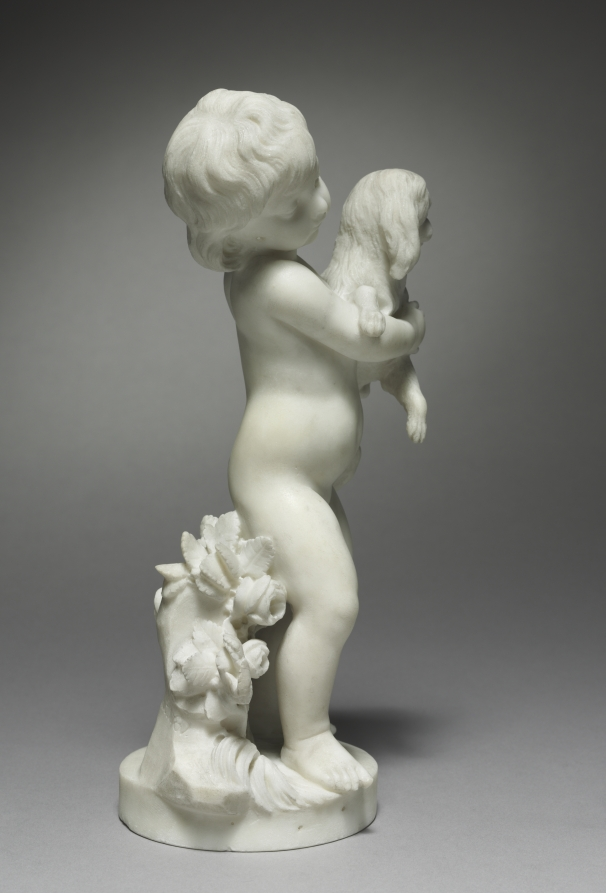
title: Faithful Love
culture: France, 19th century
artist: after Augustin Pajou (French, 1730–1809)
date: 1800s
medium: marble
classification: Sculpture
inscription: signature behind stump with roses: Pajou f(ecit) 1787.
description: These statuettes represent the opposing spectrums of love—fickle and faithful—both portrayed by Cupid. Fickle Love absent-mindedly plays with a butterfly, a symbol of the fleeting moment. Conversely, Faithful Love is accompanied by a dog, the ultimate loyal companion. These works were originally believed to be by the hand of Augustin Pajou, because the works are signed and he made nearly identical sculptures. However, due to the slightly clumsy execution and the awkward scale of the signatures, the museum now believes the statuettes were created by another artist after Pajou's design.